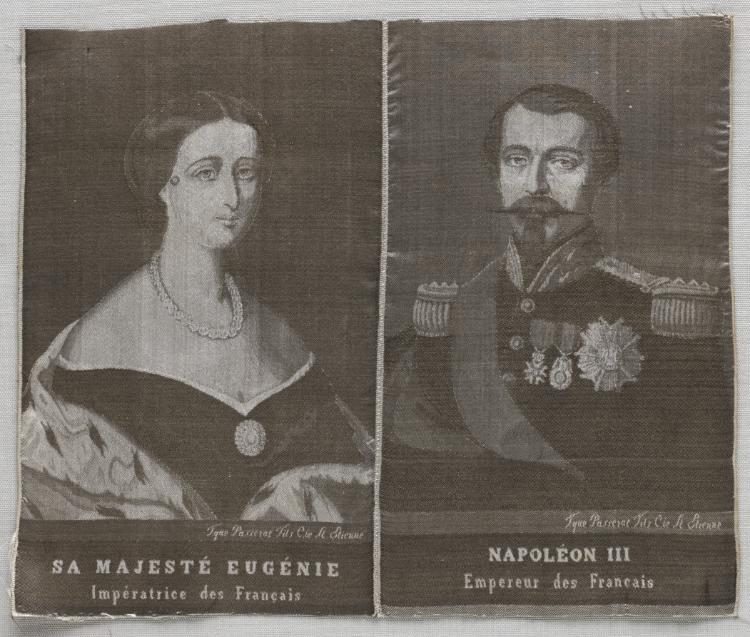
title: Eugenie and Napoleon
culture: France, 20th century (?)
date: 1900s (?)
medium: jacquard weave silk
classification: Textile